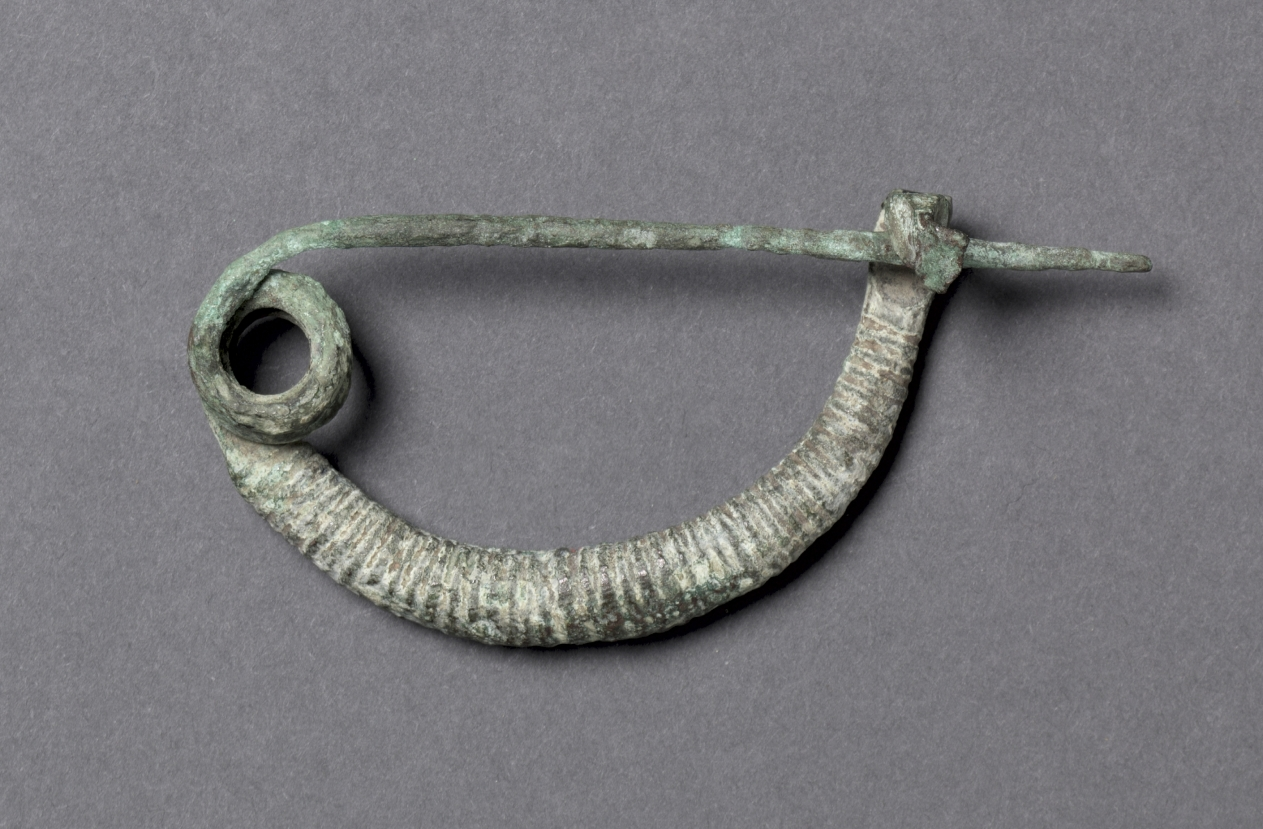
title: Fibula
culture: Italy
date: c. 900–800 BCE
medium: bronze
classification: Jewelry